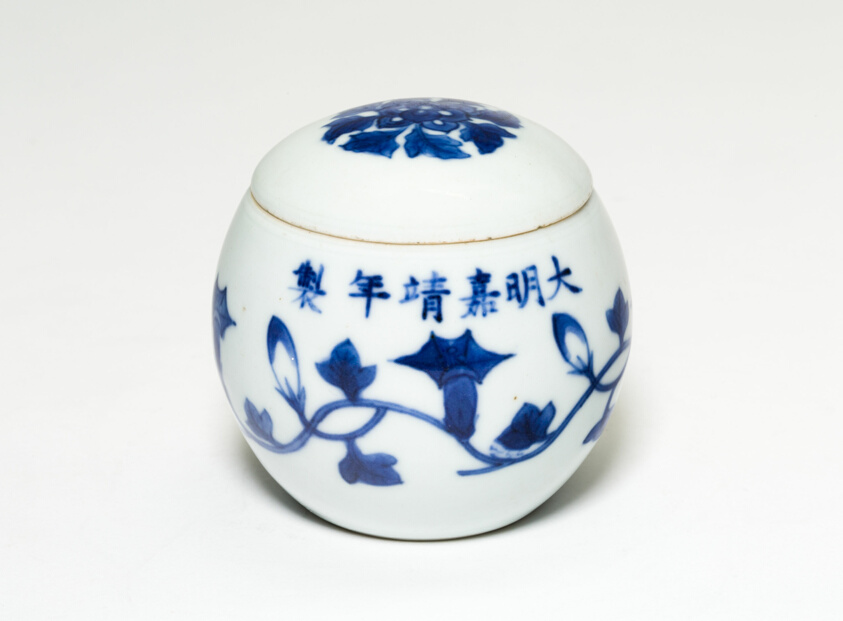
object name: Vessel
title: Covered Jar with Floral Scrolls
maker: China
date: Ming dynasty (1368–1644), Jiajing reign mark and period (1522–1566)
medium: Porcelain painted in underglaze blue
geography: China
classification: porcelain; asian art; ceramics; vessel